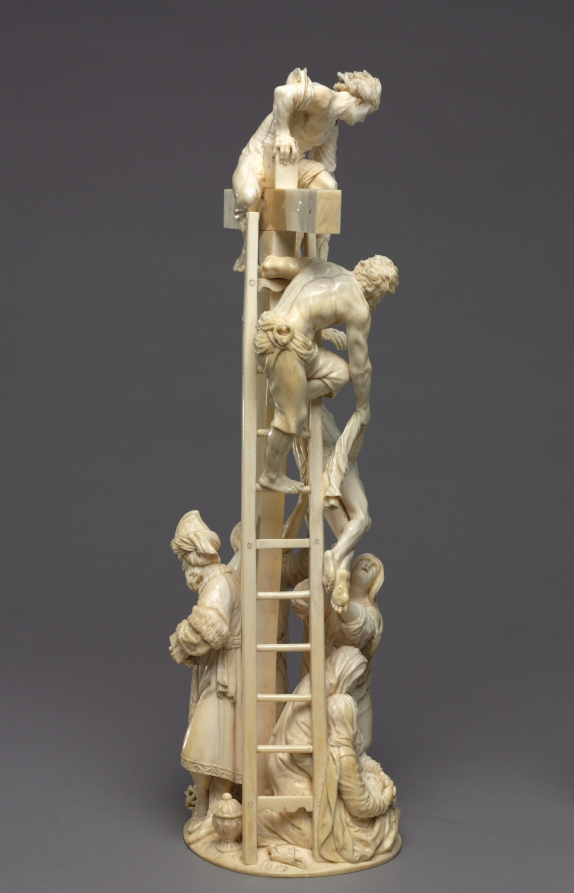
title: Descent from the Cross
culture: Austria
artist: Adam Lenckhardt (German, 1610–1661)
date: 1653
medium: ivory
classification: Sculpture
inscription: inscribed with monogram "AL" conjoined and dated 1653.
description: Carved from a single piece of ivory for Prince Karl Eusebius von Liechtenstein of Vienna, this work is a true tour-de-force. It took Lenckhardt seven years to complete; it is his last known sculpture and the pinnacle of his career. The biblical accounts of the descent from the cross found in the gospels are not consistent, which may contribute to the difficulty in precisely identifying the figures. The Virgin Mary, Saint John, Mary Magdalene, and others were said to be present, but undoubtedly there are other disciples here mourning Christ’s death. The intense emotion registers on the faces of the figures in the scrupulous and exquisitely detailed work.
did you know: Carved from a single elephant tusk, the artist took special care to ensure the ivory did not crack or break as he meticulously crafted each figure in this visually exciting sculpture. Look closely to find tools and small objects included near its base.